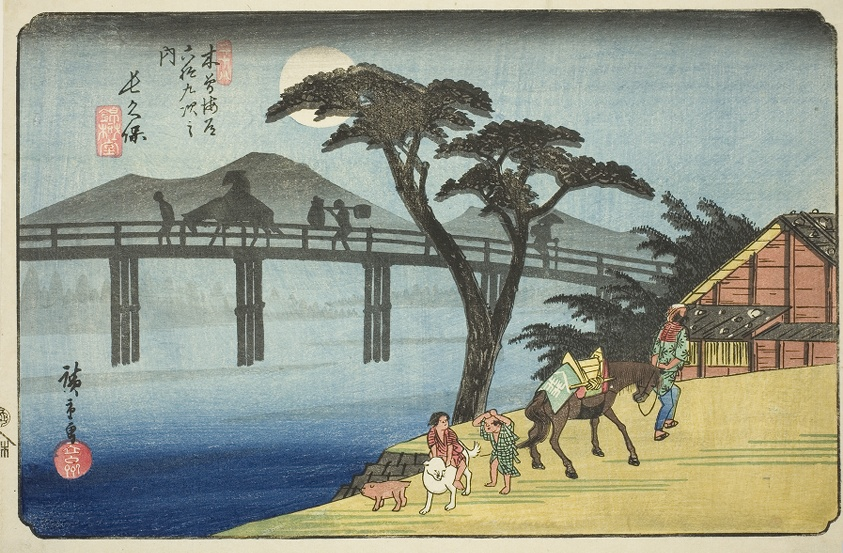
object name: Print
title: No. 28: Nagakubo, from the series "Sixty-nine Stations of the Kisokaido (Kisokaido rokujukyu tsugi no uchi)"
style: Japanese (culture or style)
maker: Utagawa Hiroshige 歌川 広重; Japanese, 1797-1858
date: c. 1835/38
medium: Color woodblock print; oban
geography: Japan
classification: woodblock print; print; asian art